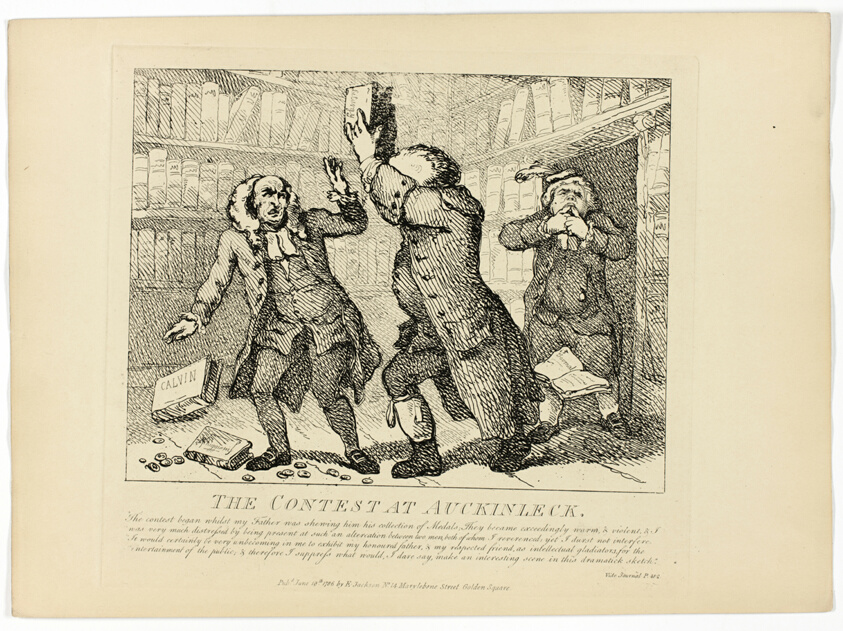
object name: Print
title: The Contest at Auckinleck, from Boswell's Tour of the Hebrides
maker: Thomas Rowlandson (English, 1756-1827)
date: 1786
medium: Etching on paper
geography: England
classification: etching; print; prints and drawing